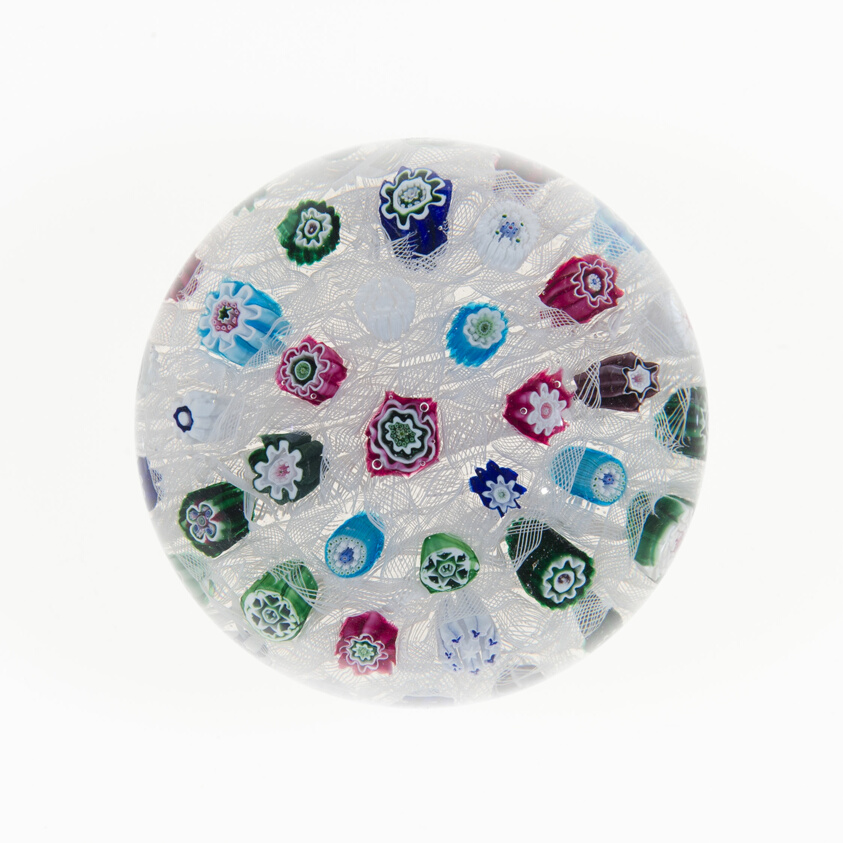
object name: Glass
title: Paperweight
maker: Clichy Glassworks (Cristalleries de Clichy); Clichy, France, 1837-1885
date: c. 1845/60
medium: Glass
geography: France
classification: paperweight; glass